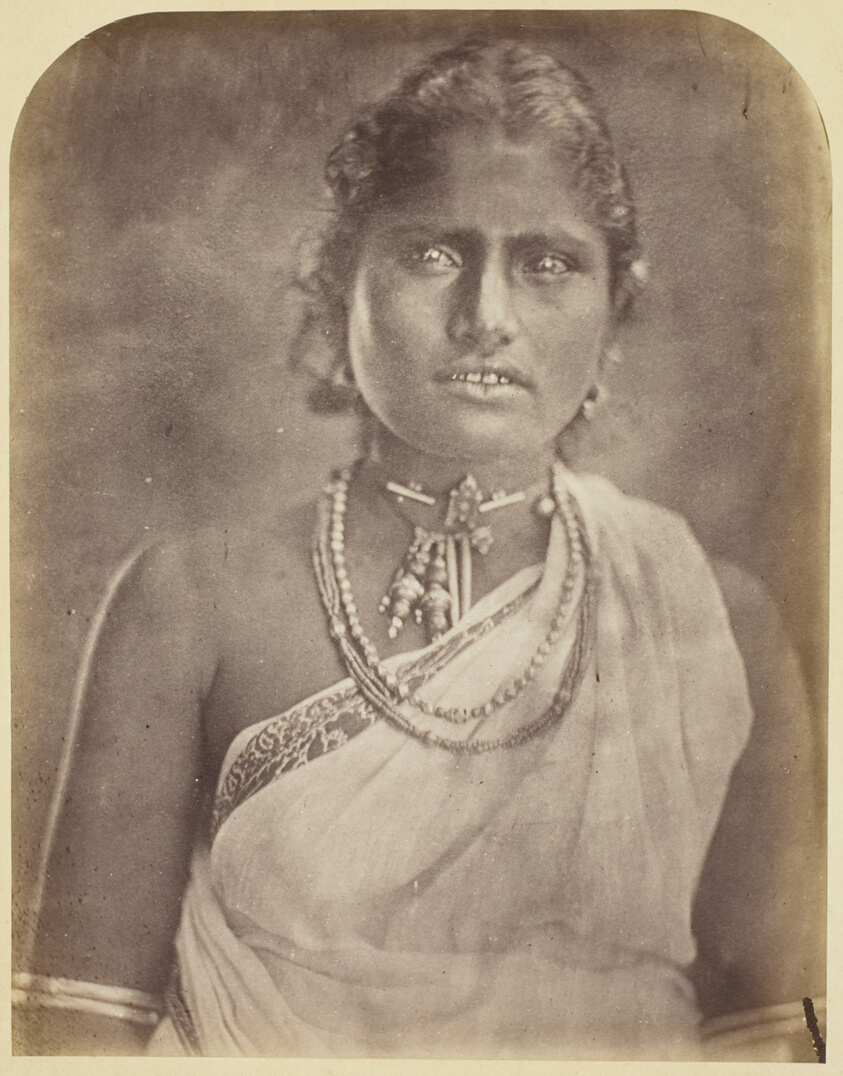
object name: Photograph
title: Sinhalese Woman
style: 19th century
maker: Julia Margaret Cameron (English, 1815–1879)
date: 1875/78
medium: Albumen print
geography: England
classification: albumen silver print; photographic process; photography; photograph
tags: portraits, portraits: female subject, photography